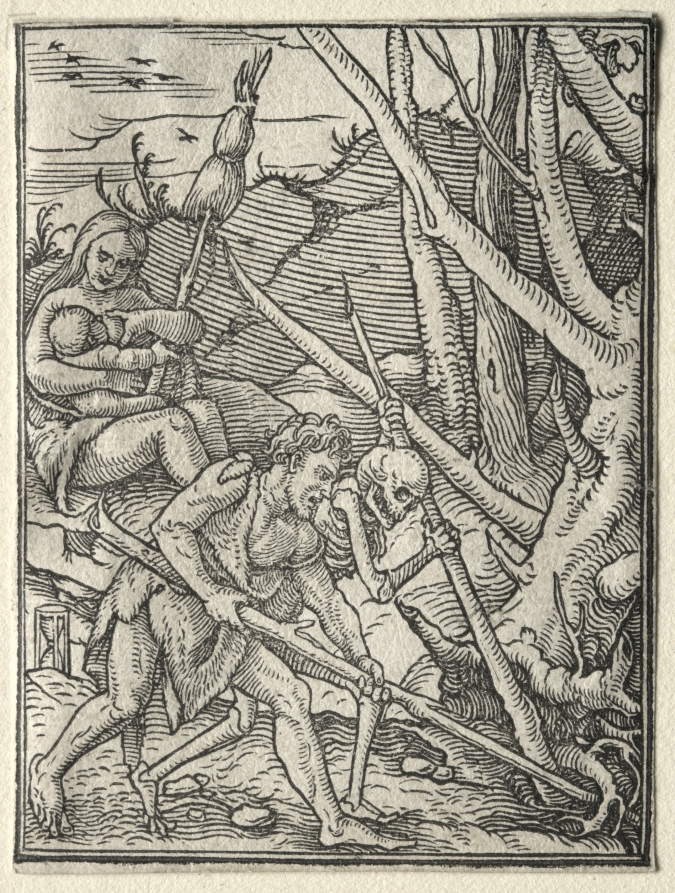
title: The Dance of Death: Adam Tilling the Earth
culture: Germany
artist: Hans Holbein the Younger (German, active England and Switzerland, 1497/98–1543)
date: c. 1526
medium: woodcut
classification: Print